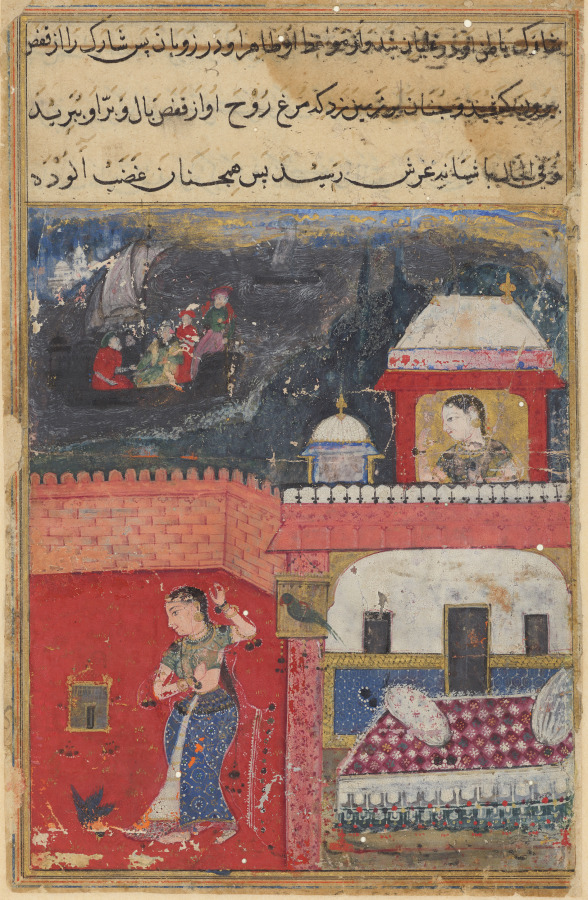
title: Khujasta kills the pet mynah who advises her not to be unfaithful to Maymun, her husband, from a Tuti-nama (Tales of the Parrot): First Night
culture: Mughal India, court of Akbar (reigned 1556–1605)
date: c. 1560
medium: gum tempera, ink, and gold on paper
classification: Painting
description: The first illustration of the Cleveland Tuti-Nama shows the merchant departing and his wife killing the mynah bird that tells her not to commit adultery. The bright red background and composition are Indian, while the delicacy of drawing is Persian, and the atmospheric effects in the upper left are a Mughal development.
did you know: Merchant ships brave treacherous waters; a distant city appears in the upper left.